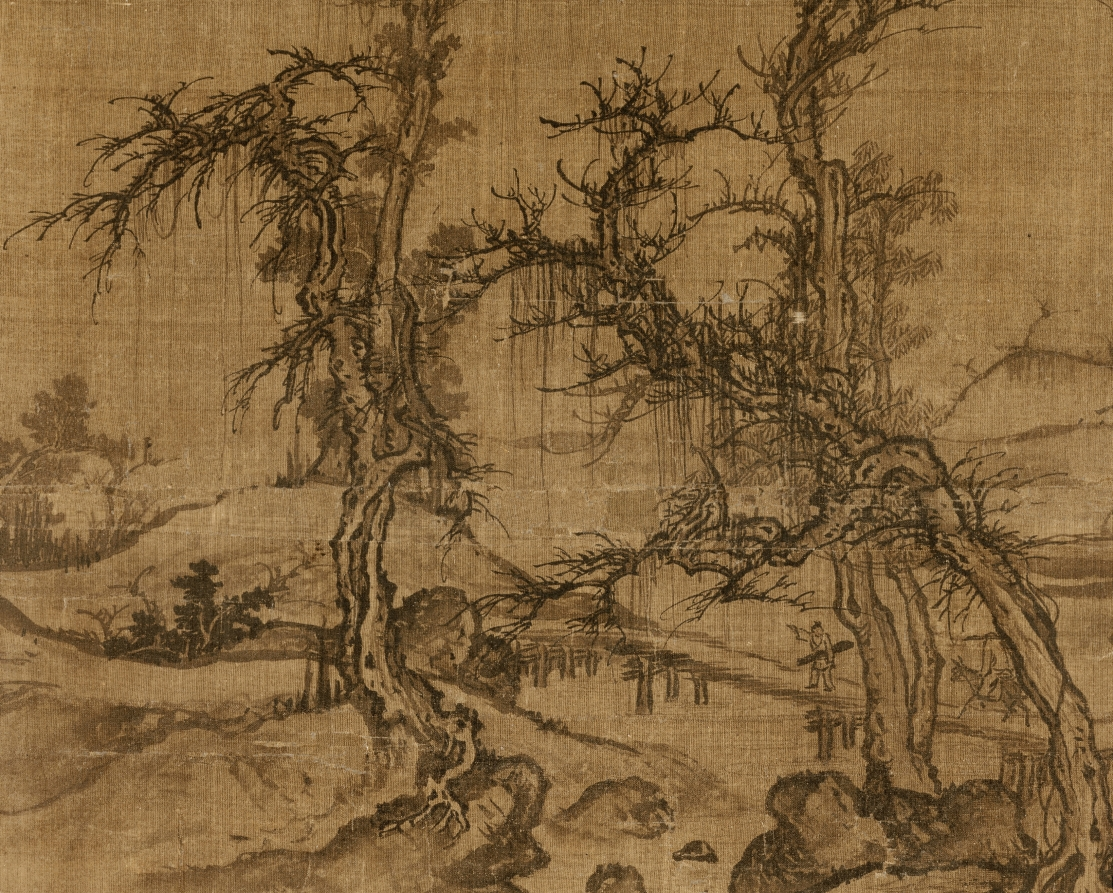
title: Carrying a Qin on a Visit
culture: China, Yuan dynasty (1271-1368)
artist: attributed to Luo Zhichuan (Chinese, active 1280s–1320s)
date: 1271–1368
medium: hanging scroll (now paneled), ink on silk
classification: Painting